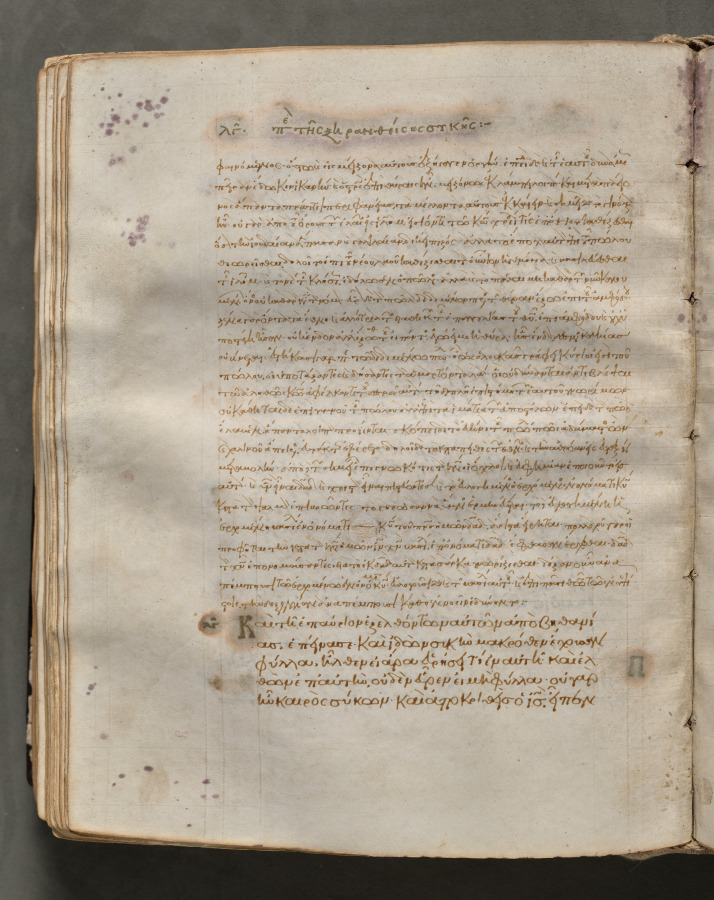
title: Text, folio 173 (verso), from a Gospel Book with Commentaries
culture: Byzantium, Constantinople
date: c. 1000–1100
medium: ink, tempera, and gold on vellum; leather binding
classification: Bound Volume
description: Each of the four gospels in this book opens on a page with brilliantly illuminated borders depicting the author of the text as well as birds-principally peacocks, symbols of the immortality of the soul-and fountains, representing the fountain of life and the salvation of the soul. This volume consists of 428 leaves with texts in Greek. Its level of sophistication suggests that it was probably written and decorated in a monastery in Constantinople.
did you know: Gospel Books were carried in procession through Byzantine churches.